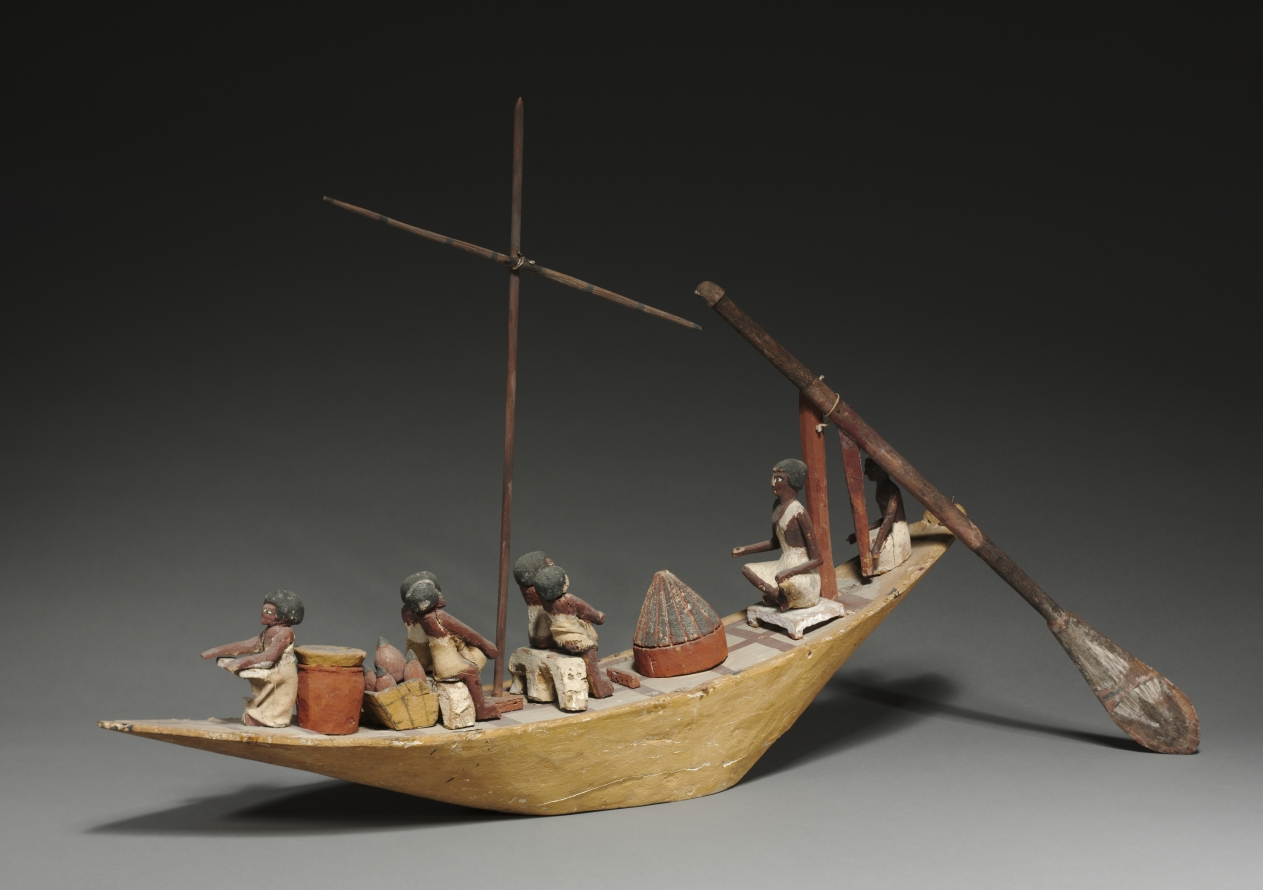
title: Model Boat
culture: Egypt, Middle Kingdom (2040–1648 BCE), Dynasties 11–12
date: 2040–1648 BCE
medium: gessoed and painted sycamore fig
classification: Funerary Equipment